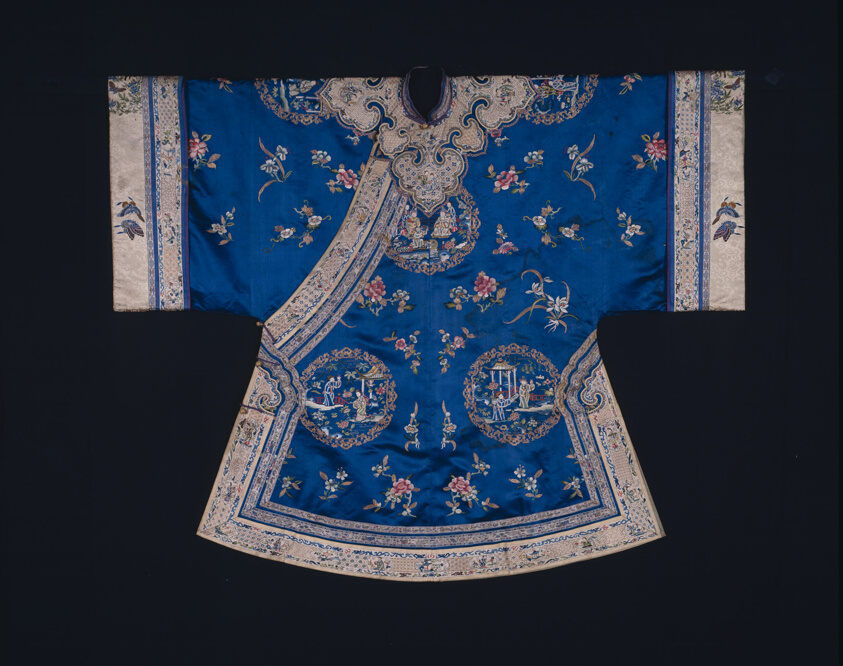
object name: Costume and Accessories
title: Woman's Ao (Short Robe)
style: han (chinese), Chinese (culture or style), East Asian, asian, qing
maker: Han-Chinese (China)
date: Qing dynasty (1644–1911), 1875/1900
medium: Silk, warp-float faced 7:1 satin weave; embroidered with silk and gold-leaf-over-lacquered-paper-strip-wrapped silk in knot, satin and stem stitches; laid work and couching; sleeve facing: silk, 7:1 satin damask weave; embroidered with silk and gilt-metal-strip-wrapped silk in knot, satin, single satin, split, and stem stitches (under drawing in black ink or graphite); edging and cloud collar: silk, warp-float faced 7:1 satin weave; embroidered with silk and gold-leaf-over-lacquered-paper-wrapped silk in satin and stem stitches; laid work and couching; collar: silk, 7:1 satin damask weave; ribbons: silk and gold-leaf-over-lacquered-paper-strip-wrapped cotton, stripes of 7:1 satin weave and stripes of plain weave with supplementary patterning warps and of silk and gold-leaf-over-lacquered-paper-strip-wrapped cotton, stripes of 7:1 satin weave, and stripes of plain weave with supplementary patterning warps; tapes: silk and gold-leaf-over-lacquered-paper-strip-wrapped silk, 1:1 oblique interlacing and silk, plain weave with self-patterning main warp floats; trim and closures: silk, warp-float faced 7:1 satin weave; lined with silk, plain weave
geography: China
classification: textile; needlework (visual works); costume; weaving